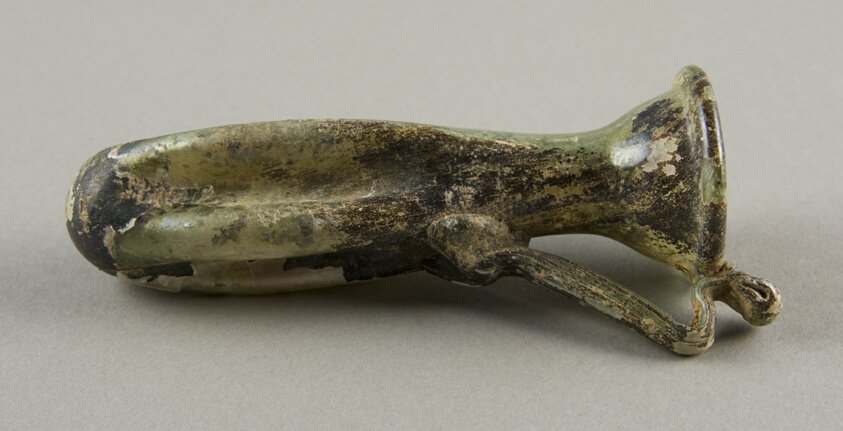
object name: Vessel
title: Flask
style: syrian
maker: Roman; Levant or Syria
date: 3rd century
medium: Glass, blown technique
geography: Syria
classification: glass; vessel; ancient art